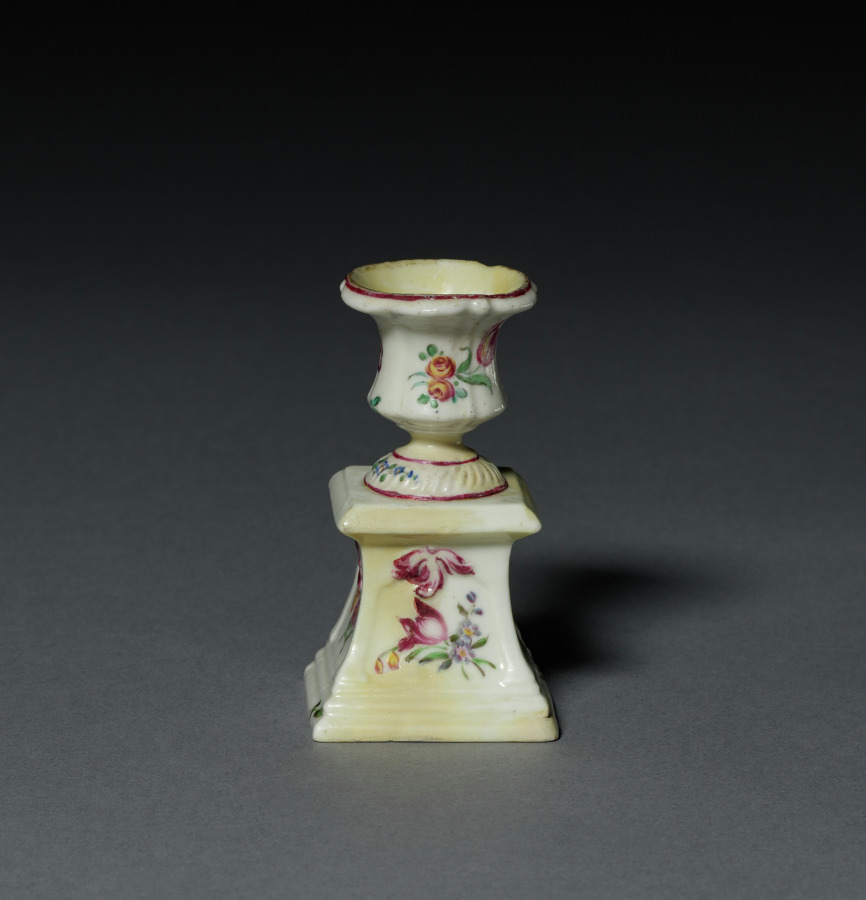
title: Medici Vase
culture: France, Mennecy, 18th century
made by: Mennecy Factory (French)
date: c. 1760–1765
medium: soft-paste porcelain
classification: Ceramic